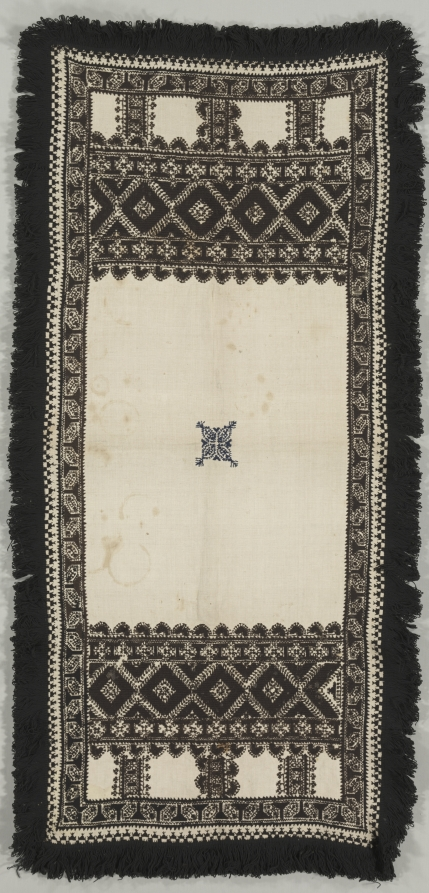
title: Embroidered Mat or a Paños de Ofrenda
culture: Spain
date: 1800s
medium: embroidery; wool on linen, wool fringe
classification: Embroidery